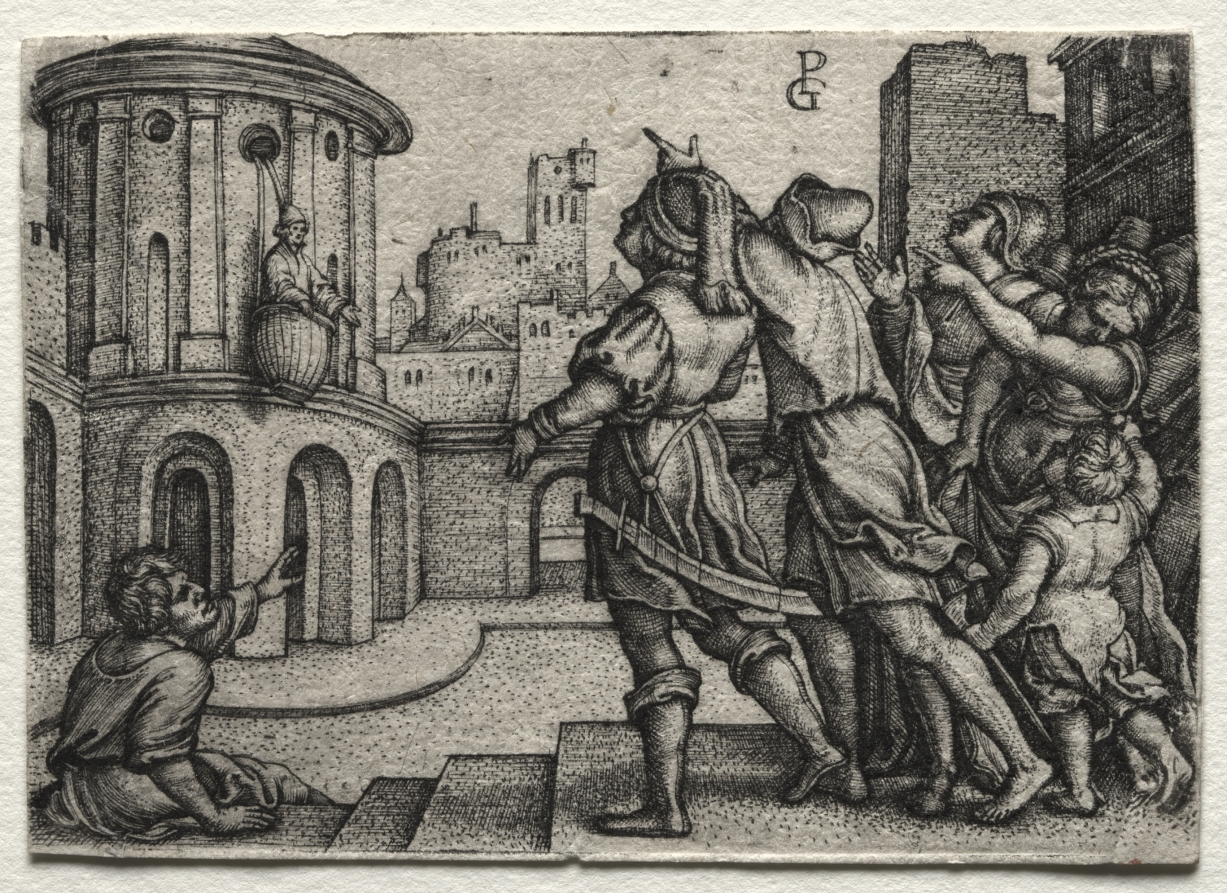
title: Virgil hanging in a Basket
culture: Germany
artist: Georg Pencz (German, c. 1500–1550)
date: c.1541–42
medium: engraving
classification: Print